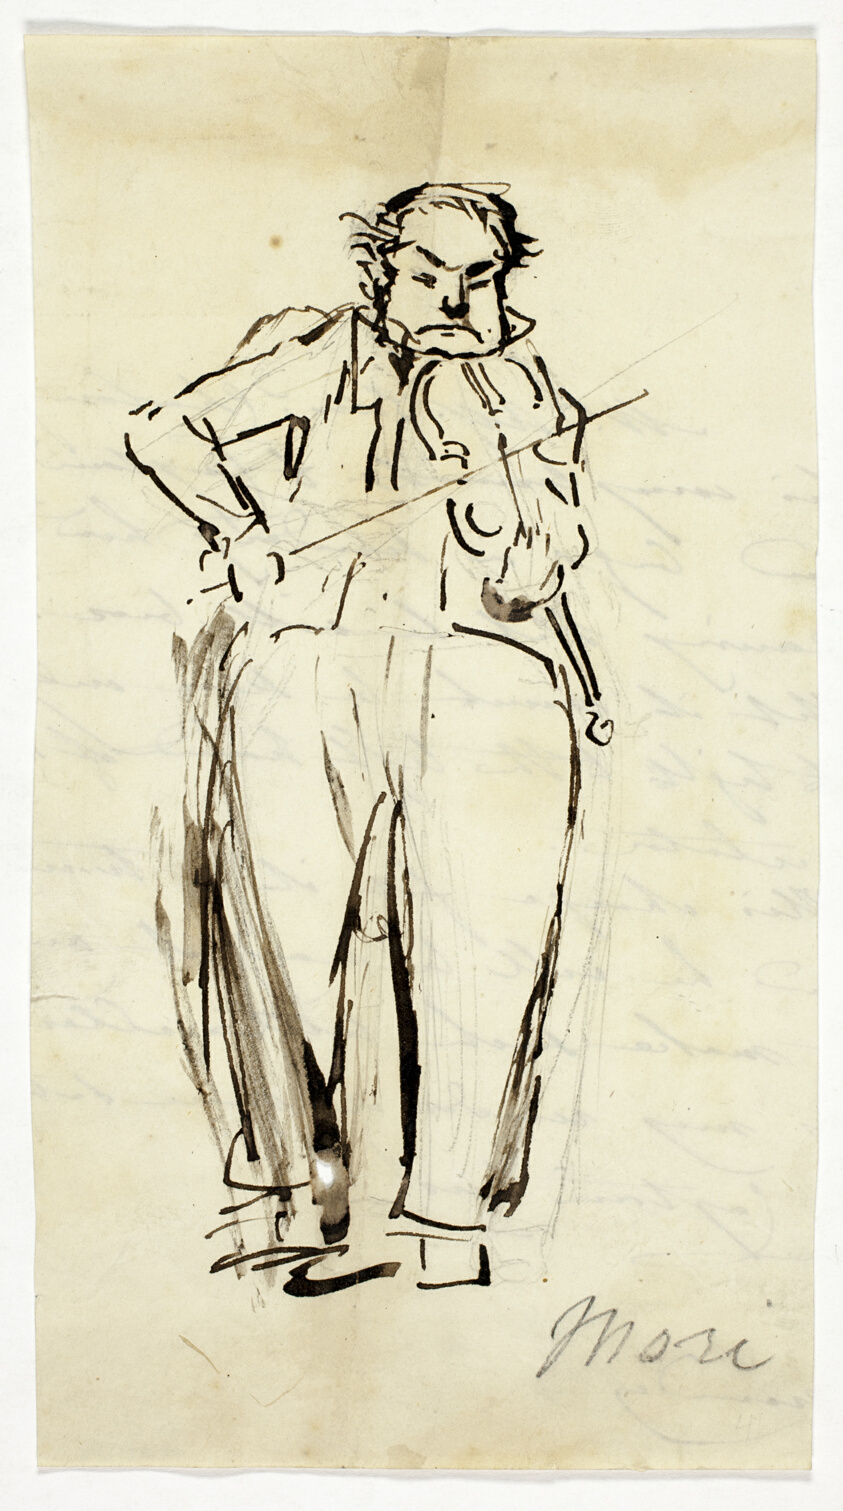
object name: Drawing and Watercolor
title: Nicolas Mori, Violinist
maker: Attributed to Alfred Edward Chalon; English, born Switzerland, 1780-1860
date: c. 1840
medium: Pen and brown ink, over graphite, on ivory wove paper, tipped onto cream wove paper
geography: England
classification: pen and ink drawings; drawings (visual works); prints and drawing